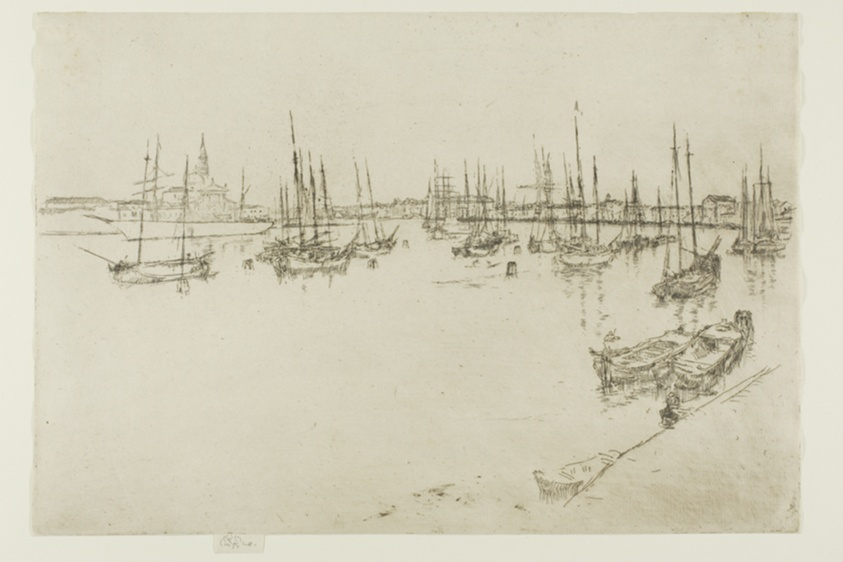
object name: Print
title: San Giorgio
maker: James McNeill Whistler (American, 1834-1903)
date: 1879/80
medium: Etching and drypoint with foul biting in black ink on cream laid paper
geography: United States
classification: etching; foul biting; print; prints and drawing; paper; drypoint